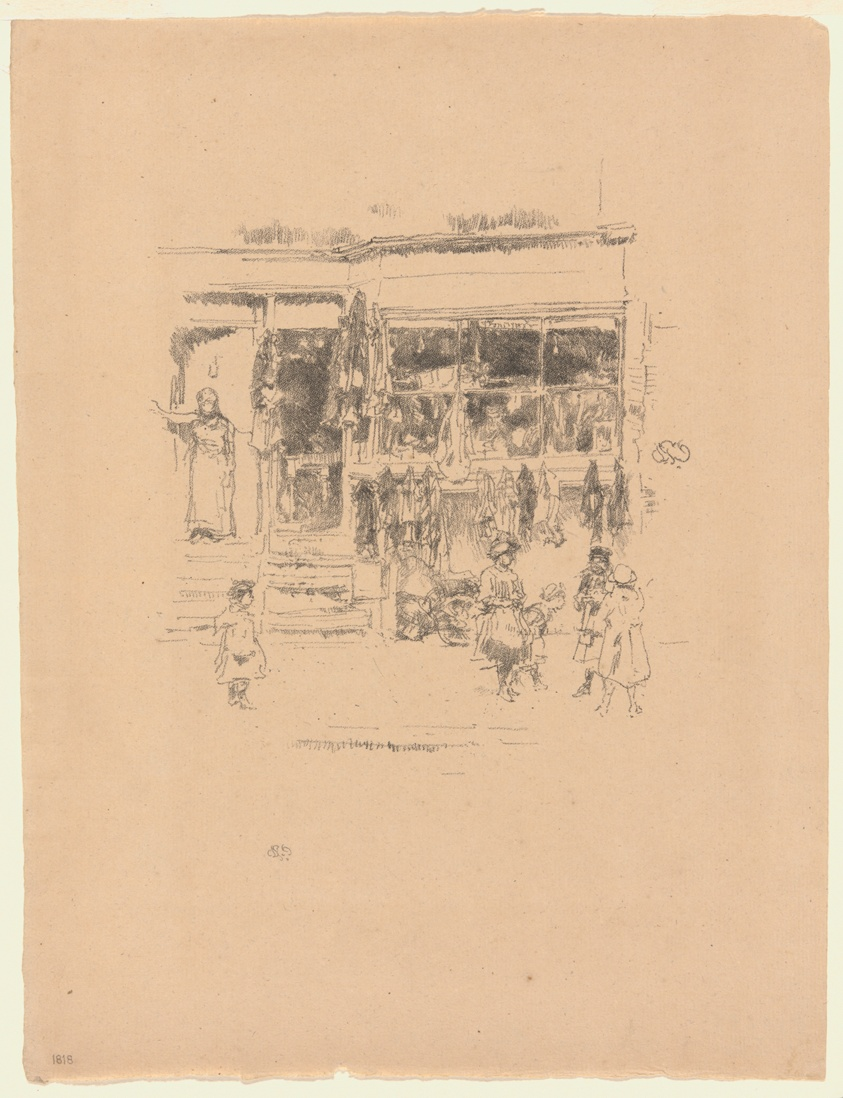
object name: Print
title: Chelsea Rags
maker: James McNeill Whistler (American, 1834-1903)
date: 1888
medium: Transfer lithograph in black on tan laid paper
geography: United States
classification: transfer lithograph; lithograph; print; prints and drawing; paper